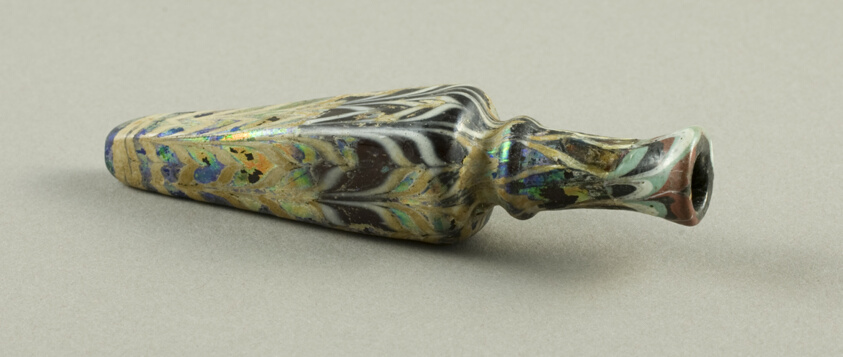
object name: Vessel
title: Bottle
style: Islamic (culture or style)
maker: Islamic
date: 7th-13th century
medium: Glass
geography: Mediterranean Region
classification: glass; vessel; ancient art